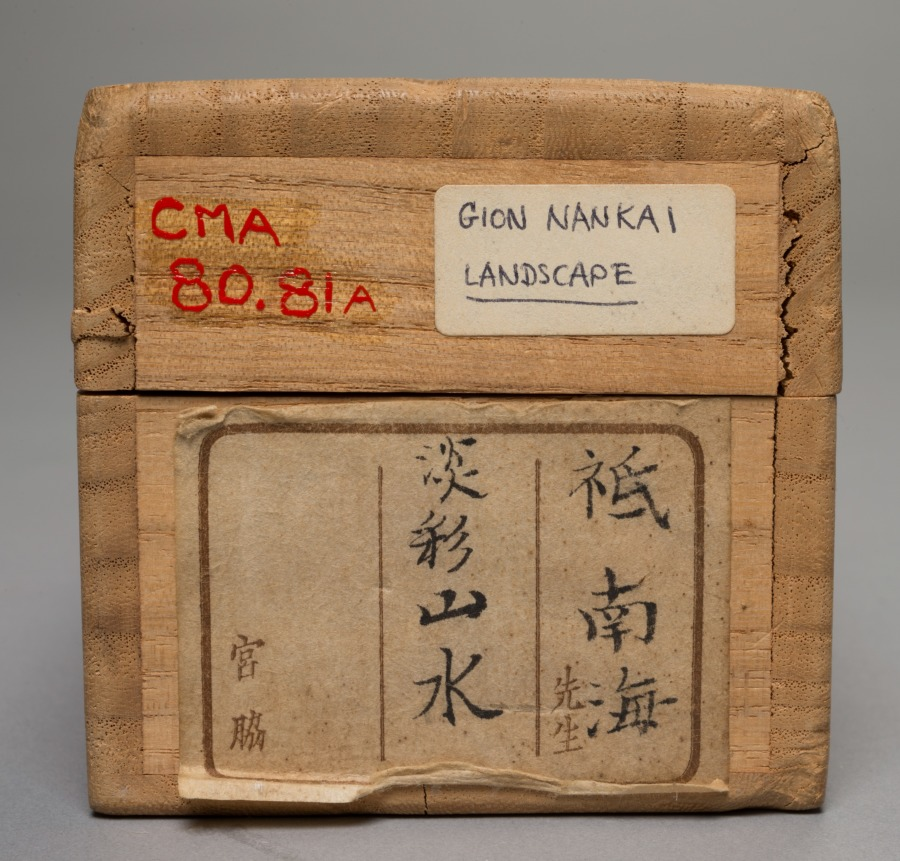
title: Landscape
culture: Japan, Edo period (1615–1868)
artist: Gion Nankai (Japanese, 1677–1751)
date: c. 1700–1751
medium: hanging scroll; ink and color on paper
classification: Painting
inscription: artist's inscription, signature and two seals at upper right corner.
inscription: The mountain pavilion is desolate, visitors are rare./ Mud patches the brushwood gate; leaves patch my clothes./ Rising not from the bamboo bed, my head like snow./ Already without intent, I abandon questions of Zen.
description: A teacher of Confucian ethics, the Chinese philosophical system focused on social harmony and familial responsibility, Gion Nankai was also a painter. Ike Taiga (池大雅) (1723–1776) was among his students. Nankai inscribed this landscape with one of 24 poems for painting subjects composed by the scholar and painter Tang Yin (唐寅) (Chinese, 1470–1524). It reads as follows: The mountain pavilion is desolate, visitors are rare. Mud patches the brushwood gate; leaves patch my clothes. Rising not from the bamboo bed, my head like snow. Already without intent, I abandon questions of Zen.